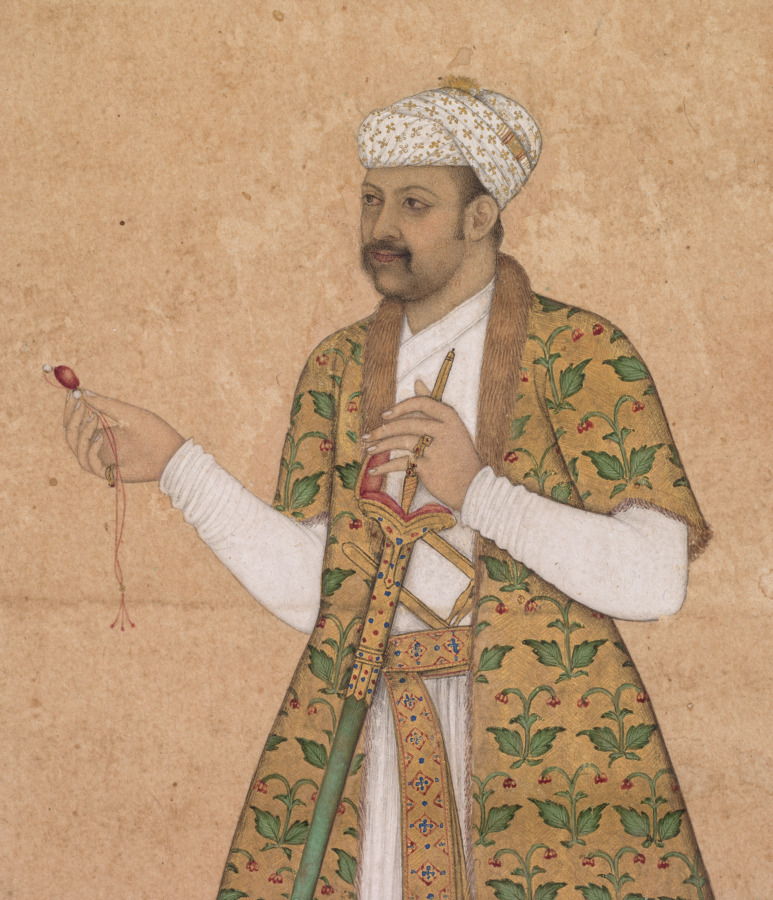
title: A Courtier, Possibly Khan Alam, Holding a Spinel and a Deccan Sword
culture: Mughal India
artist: attributed to Govardhan (Indian, active c.1596–1645)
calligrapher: Abd al-Rahim, the Anbarin-Qalam (Indian, active c. 1590–1630)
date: c. 1605–1610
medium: gum tempera, ink, and gold on paper, text on verso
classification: Painting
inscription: Verso: A tahshiyya (marginal addendum) in rhymed prose from the Gulistan (Rose Garden) of Sa‘di (Persian, 1210–1291) and the Nafahat al-Uns (Breaths of Fellowship) of Abd al-Rahman Jami (Persian, 1414–1492), c. 1605, Abd al-Rahim, the Anbarin-Qalam (Indian, active c. 1590–1630), Mughal court; In nast’aliq script: O Lord of the all dominions Praise and thanks to God—may he be honored and glorified!—whose worship brings one closer to him and giving thanks [to him] increases his bounty. [Each breath] that one inhales, prolongs life, and when exhaled a rejuvenation of the soul. Thus each breath contains two blessings, and on each blessing gratitude is due. Who is able, by word or deed, to fulfill the task of paying him due thanks? It is more apt for his slaves to seek at the Divine court pardon for their shortcomings, for what truly is worth his lordship none can render adequately. Persian verses from the Nafahat al-uns quoting a poem by the mystic Sheikh Ruzbihan of Shiraz (Persian, 1128–1209), in nast’aliq script: That which has not been visible to the eye of time; That which has not been audible to the ears of the earth; Has manifested itself in the clay of my being. Come at once and see it in my clay.This page has been written as marginalia to the book Mir’at al-quds [Mirror of Holiness],written by the wretched Abd al-Rahim Anbarin-Qalam, may God forgive his sins.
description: According to Akbar's court historian, the emperor ordered likenesses to be taken of the grandees of his realm. "An immense album was thus formed: those that have passed away have received a new life, and those who are still alive have immortality promised them." Akbar's son and successor, Jahangir (reigned 1605-27), continued the tradition of commissioning works of lifelike portraiture for inclusion in imperial albums. This courtier wears an opulent fur-trimmed, fringed velvet coat over his belted white tunic and striped pants-the typical Mughal dress derived from their roots among the nomadic horse-riding people of Central Asia. The artist has reveled in creating the soft textures of the facial hair, fur and fabrics. He holds a ruby-like gemstone called a spinel, which was prized among the Mughals for its talismanic properties of protection during battle.